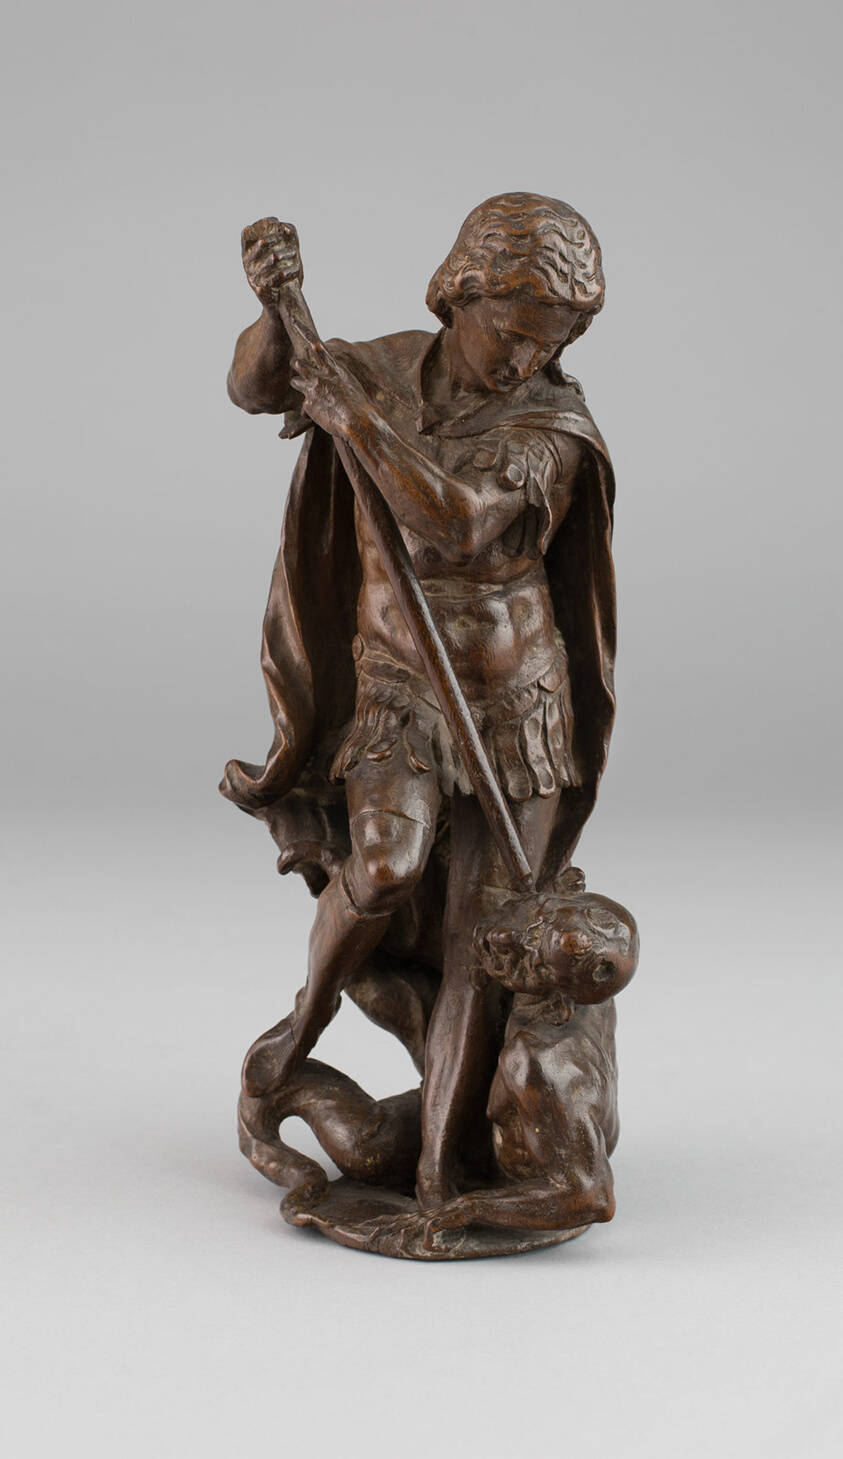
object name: Sculpture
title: Archangel Michael Overcoming the Devil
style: Renaissance, 16th Century, sixteenth century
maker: French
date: c. 1550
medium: Wood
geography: France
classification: statuette; sculpture; sculpture/wood; wood; french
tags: angels, armor, battles, devil/satan/lucifer/beezelbub/mephistopheles, goodness, man, spears, victory, weapons